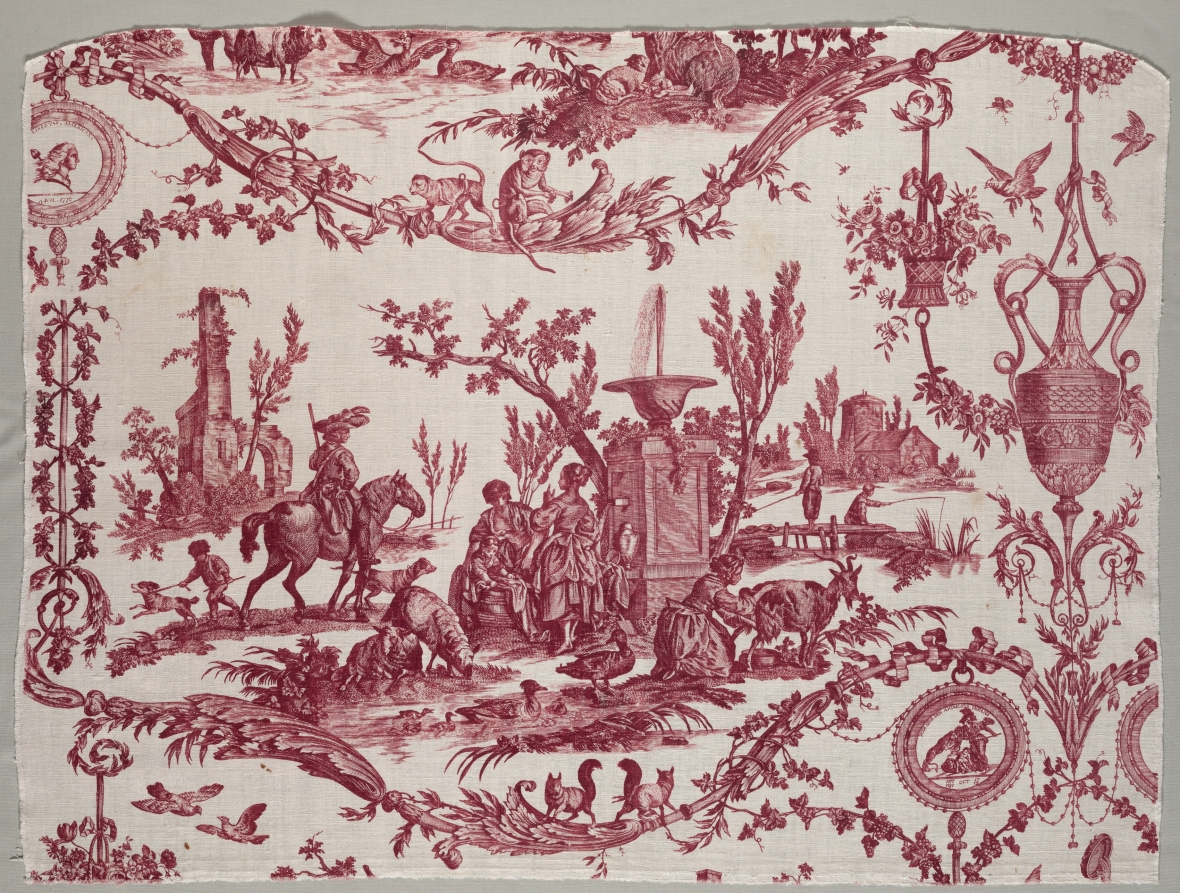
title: Fragments of Copperplate Printed Cotton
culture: France, 18th century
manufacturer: firm of Christophe Philippe Oberkampf (French, 1738–1815)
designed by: Jean-Baptiste Marie Hüet (French, 1745–1811)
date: c. 1789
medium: copperplate printed linen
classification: Textile